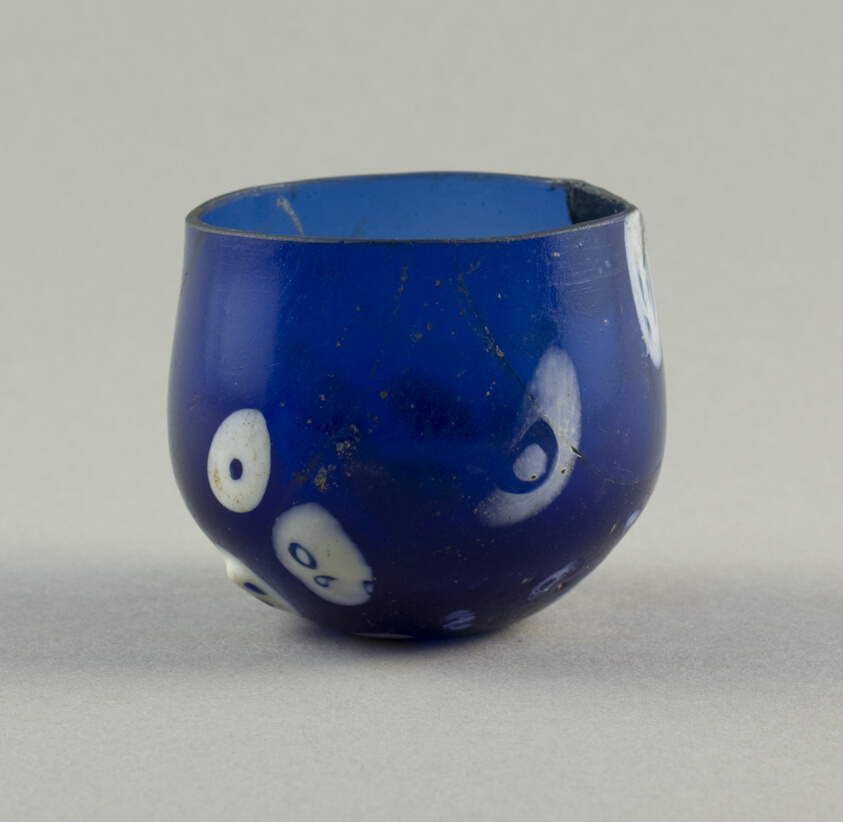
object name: Vessel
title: Bowl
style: roman (ancient, style or period), ancient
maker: Roman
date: 1st century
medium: Glass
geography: Mediterranean Region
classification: glass; vessel; ancient art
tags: bowl